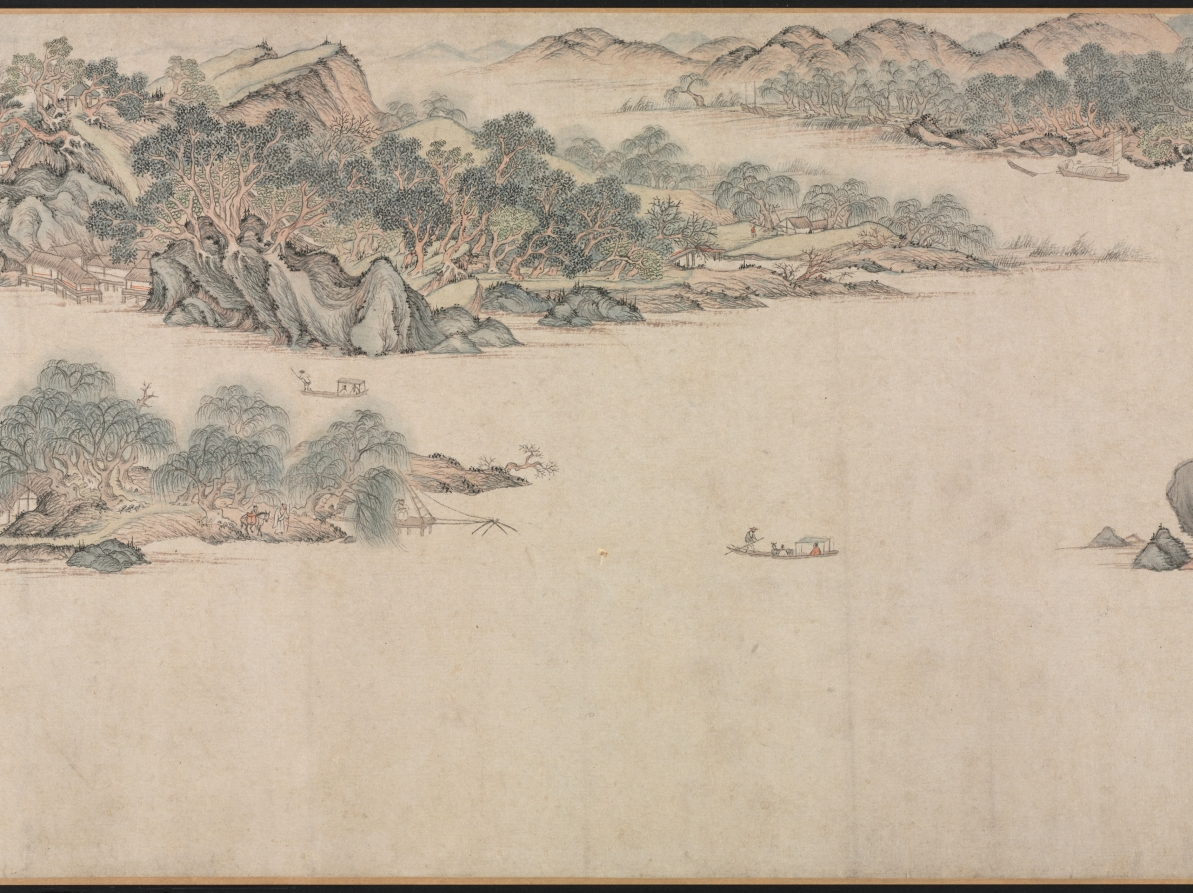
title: Greeting the Spring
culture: China, Ming dynasty (1368–1644)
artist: Wu Bin (Chinese, active c. 1591–1626)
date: 1600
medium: handscroll; ink and light color on paper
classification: Painting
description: This masterfully composed landscape in light colors and delicate brushwork is an image of the water-rich Jiangnan region in southeast China, where Wu Bin was active as an artist. Embedded in rolling hills along lakesides and streams nestle cityscapes hosting numerous spring festivities. Lantern displays and street performances in the villages salute the New Year, and are interwoven with scenes of farming, fishing, and silk making. In one scene in the middle ground, an ox made of clay under a canopy is lead in a procession to an architectural compound, a ceremony known as whipping the spring ox in hope for a good harvest. This handscroll bears five collector seals by the Qianlong emperor indicating his appreciation for the painting.